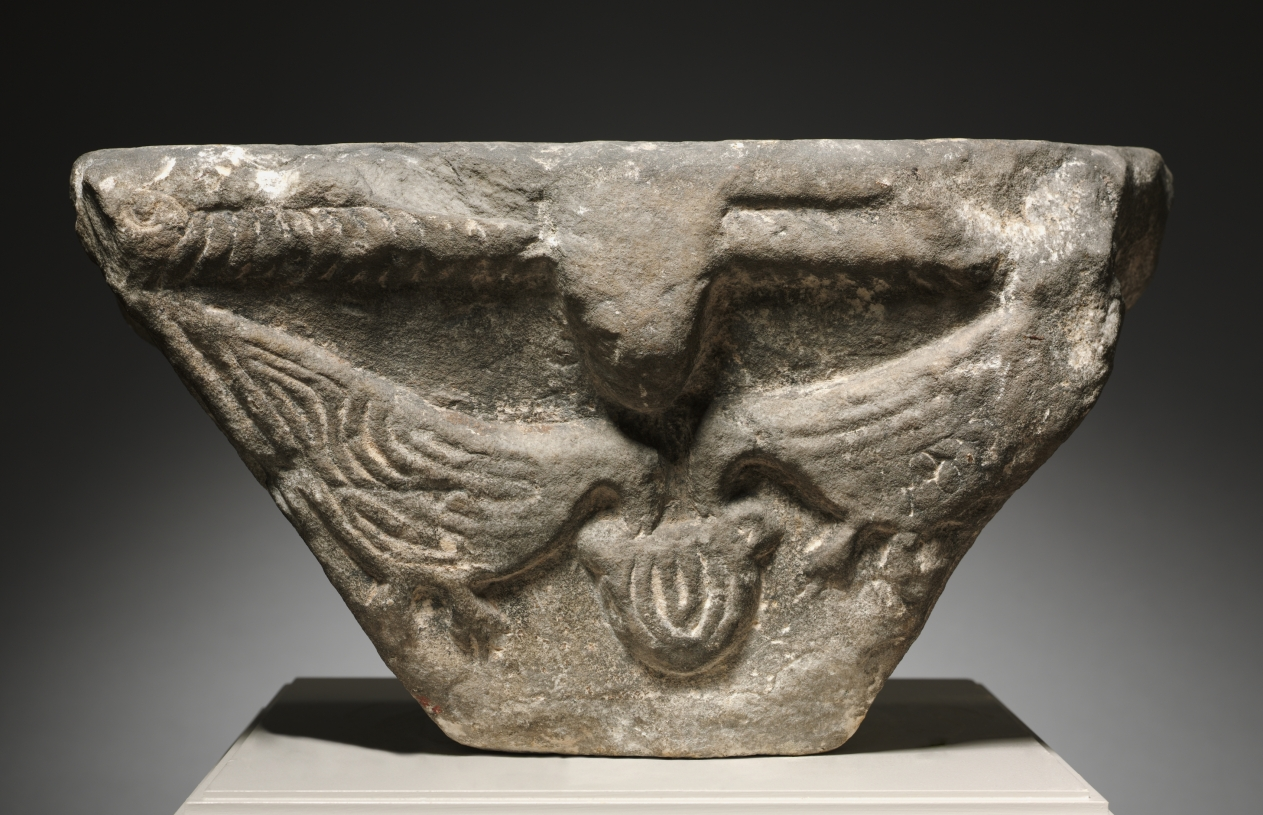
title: Capital with Birds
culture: Italy, Migration period, 8th-9th Century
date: 700s-800s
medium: marble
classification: Sculpture